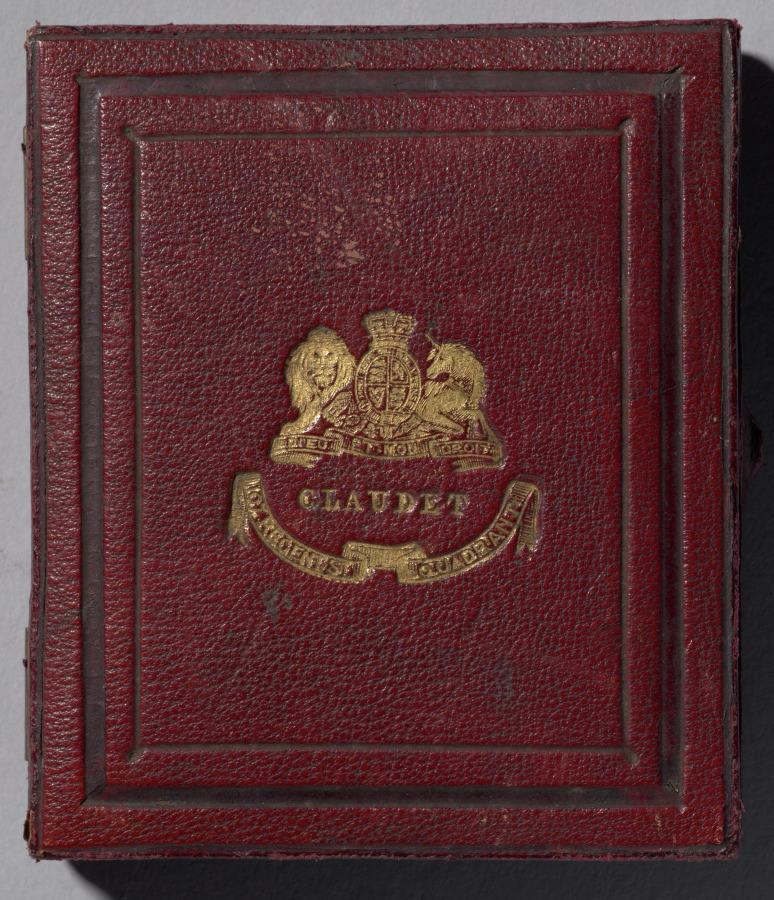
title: High-born lady in white bonnet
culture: France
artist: Antoine Claudet (French, 1797–1867)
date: c. 1855–58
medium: daguerreotype, tinted, sixth plate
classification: Photograph